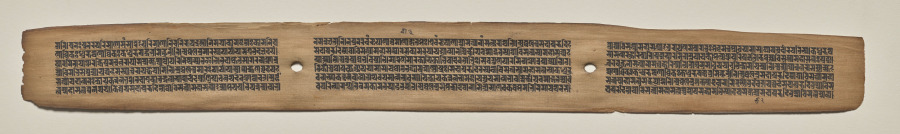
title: Text, folio 175 (recto), from a Manuscript of the Perfection of Wisdom in Eight Thousand Lines (Ashtasahasrika Prajnaparamita-sutra)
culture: Eastern India, Bihar, Vikramashila Monastery. Painting: Nepal, Kathmandu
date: Sunday, September 14, 1119 (year 239 of the Newar Samvat in the month of Ashvina)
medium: gum tempera and ink on palm leaves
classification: Painting